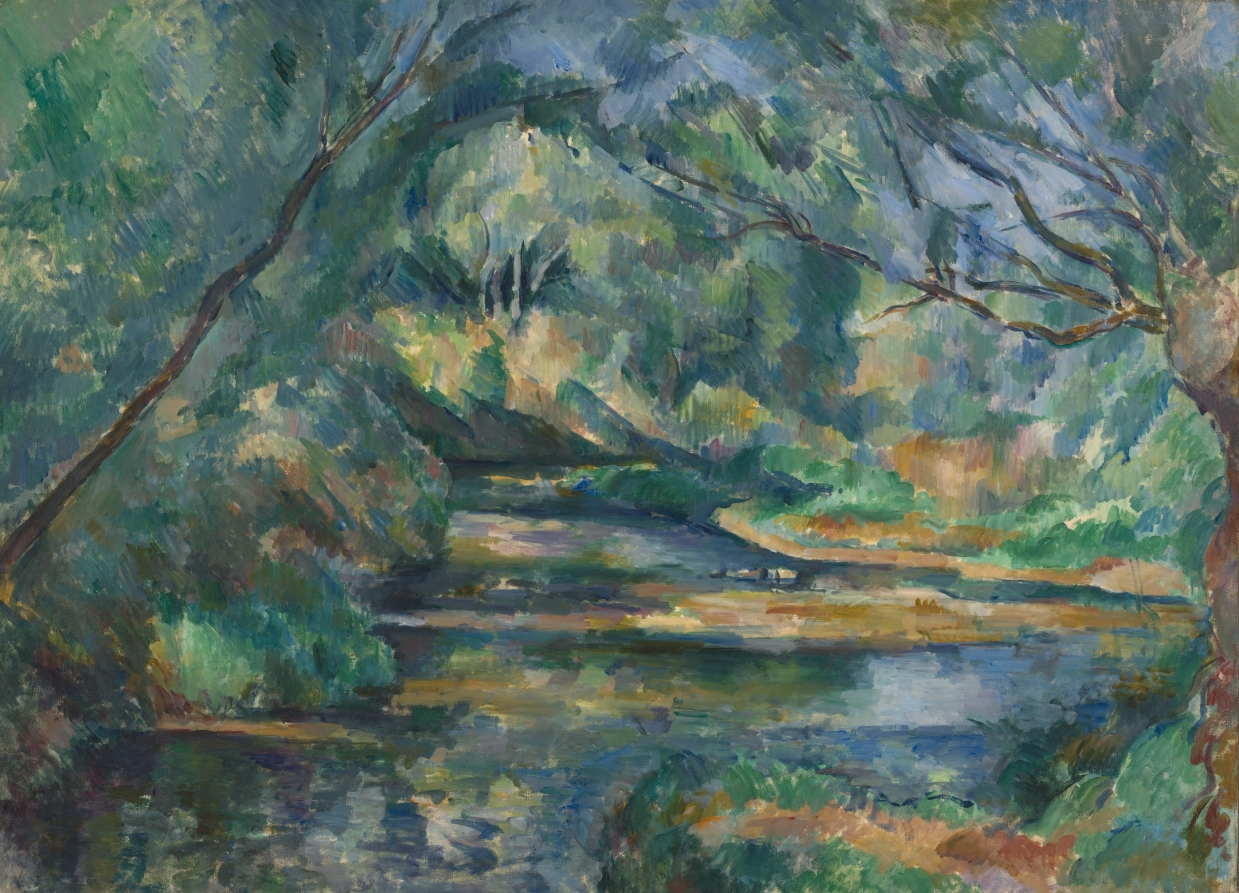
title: The Brook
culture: France, late 19th-early 20th Century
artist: Paul Cezanne (French, 1839–1906)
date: c. 1895–1900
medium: oil on fabric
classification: Painting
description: Although Cezanne exhibited twice with the Impressionists, he rejected his friends’ goals of capturing the fleeting effects of light and atmosphere in their art. Instead, he sought to create balance among the forms and colors in his compositions. This painting depicts the valley of the Arc River that runs southeast of Cezanne’s home in Aix-en-Provence. Throughout the composition, he juxtaposed strokes of different hues, describing the leaves, branches, and the stream with color rather than drawing the outlines of forms.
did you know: Cezanne rarely did preparatory sketches for his paintings. The shapes on the canvas are provided by tonal contrasts and color sensation.